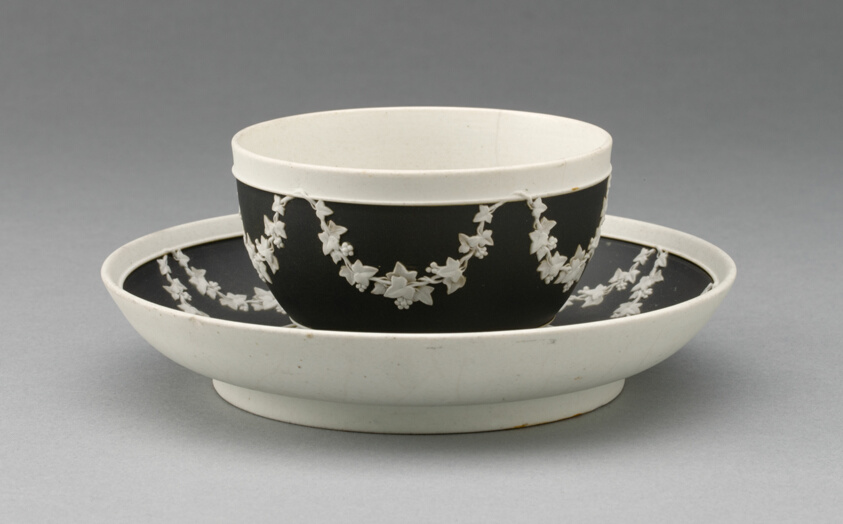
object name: Ceramics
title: Teacup and Saucer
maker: Wedgwood Manufactory (England, founded 1759)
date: c. 1800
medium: Stoneware (jasperware)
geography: Burslem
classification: drinking vessel; teaware; stoneware; european decorative arts; ceramics